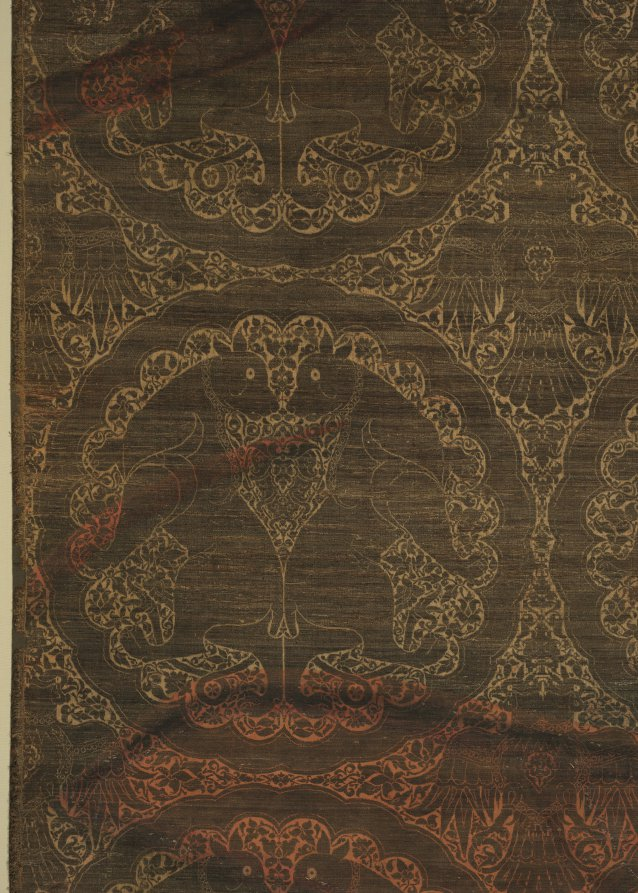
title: Cloth of gold with felines and eagles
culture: Northeast Iran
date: 1225–75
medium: Silk and gold thread: lampas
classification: Textile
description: Mongol taste for luxury was equated with gold, symbol of imperial authority, power, and legitimacy. This splendid cloth of gold-exceptionally large and luxurious-may have enriched the interior of a palace or a majestic tent. The golden pattern, although tarnished on the faded red silk ground, features scalloped medallions with felines whose long tails terminate in dragons’ heads amid elegant floral vines. Double-headed eagles form interstitial motifs on the floral ground. A radiant gold-on-gold band of pseudo-Arabic script enriches the top, woven with gold strips wrapped around a silk core on a ground of flat strips of gold, immediately beneath the pattern testing area.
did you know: Mongol cloths of gold, called nasji, incorporate Iranian, Central Asian, and Chinese features, reflecting the effects of gift exchanges and international commerce.